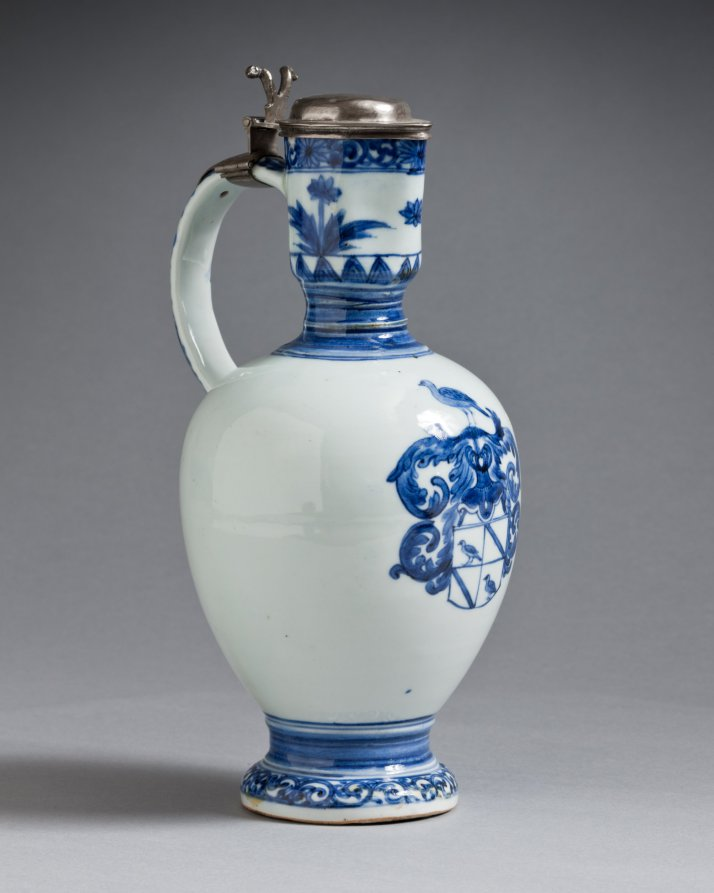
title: Jug with Silver Mounts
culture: Japan, Edo period (1615–1868)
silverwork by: Barent van Leeuwen (Dutch, 1637–1682)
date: c. 1662–76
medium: porcelain with underglaze blue decoration and silver mounts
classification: Ceramic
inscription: [on silver]: town mark for Amsterdam; lion rampant crowned (alloy mark for 0-934 silver); d (date letter for 1666), maker's mark of Barent van Leeuwen.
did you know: The coat of arms on this jug are those of the Valckenier family, active in the Dutch East India Company.